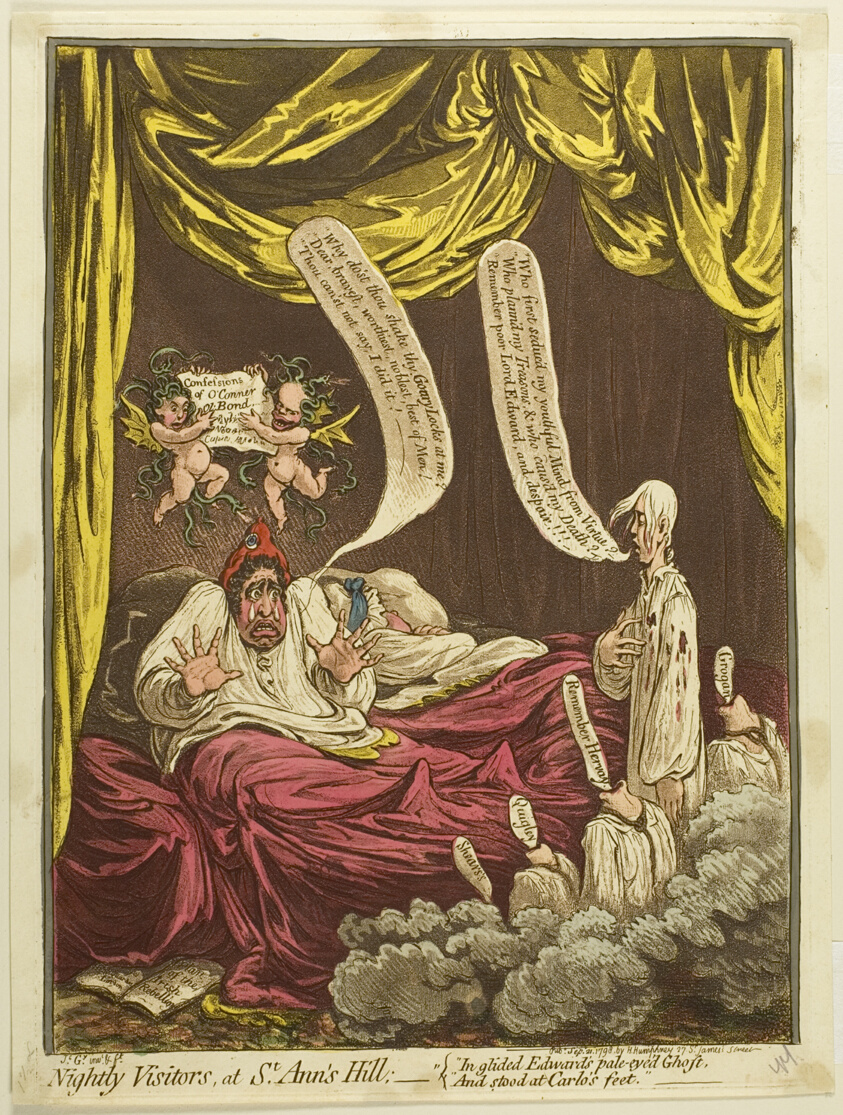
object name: Print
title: Nightly Visitors at St. Ann's Hill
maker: James Gillray (English, 1756-1815); published by Hannah Humphrey (English, c. 1745-1818)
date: published September 21, 1798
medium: Hand-colored etching and aquatint on paper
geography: England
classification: etching; print; prints and drawing